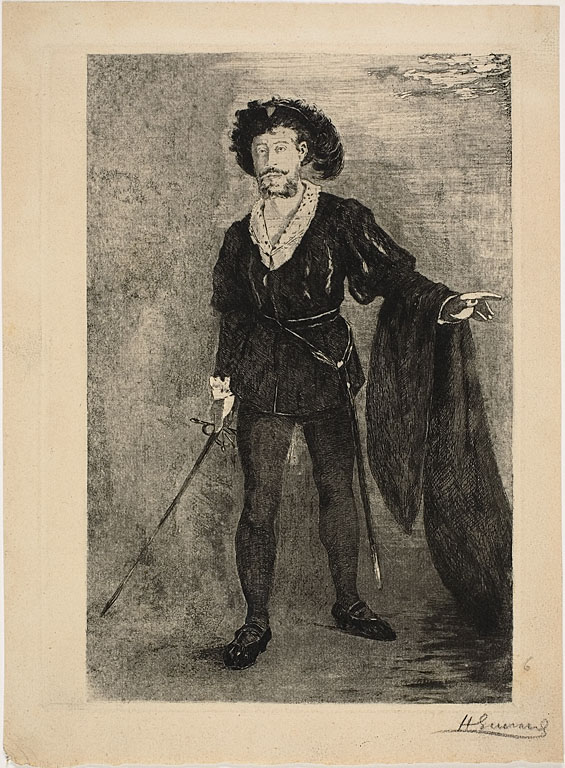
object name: Print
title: Faure in the Role of Hamlet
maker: Henri Charles Guérard (French, 1846-1897); after Édouard Manet (French, 1832-1883)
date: c. 1877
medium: Etching on cream laid paper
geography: France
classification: etching; print; prints and drawing